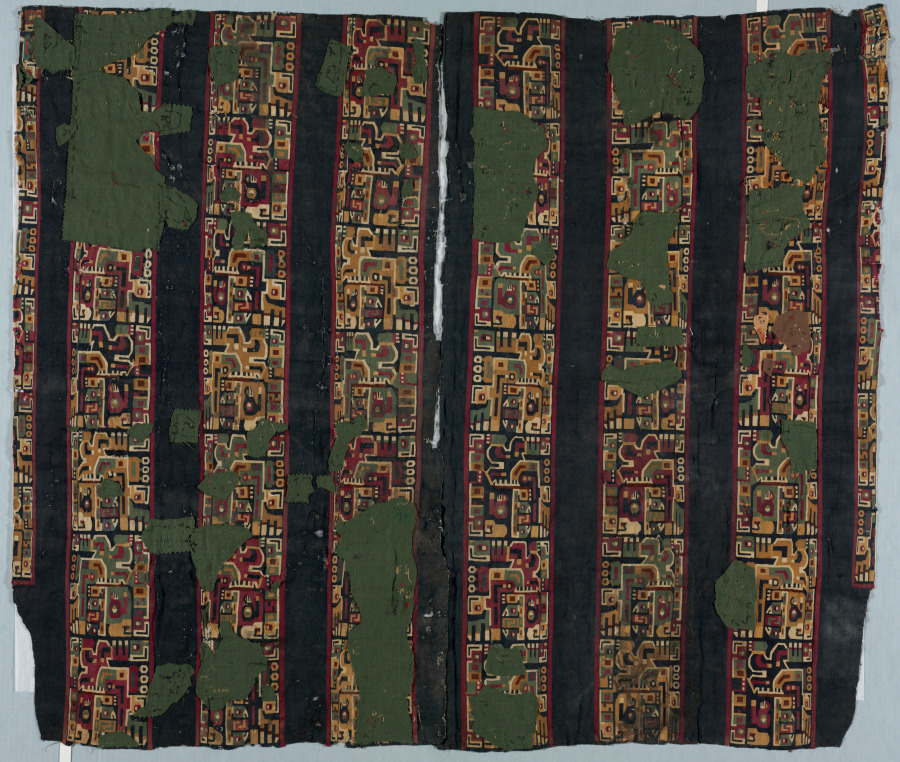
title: Tunic Fragments with Bird-Headed Creature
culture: Central Andes, Middle Horizon, Wari, 6th-11th century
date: 600–1000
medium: Camelid fiber, cotton; tapestry weave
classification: Textile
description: The bird-headed creature in profile that repeats in each of this tunic's design fields gazes upward, holds a staff of authority in front of its body, and wears an ornate headdress behind which a three-feathered wing can be seen. The extremely high technical quality of such tunics suggests that the Wari reserved bird imagery for their most exalted rulers. Here, the original incorporated more than twice as much yarn as the routine--some 19 miles, all handmade and much dyed an inky, dark blue, the most prestigious of Wari colors.